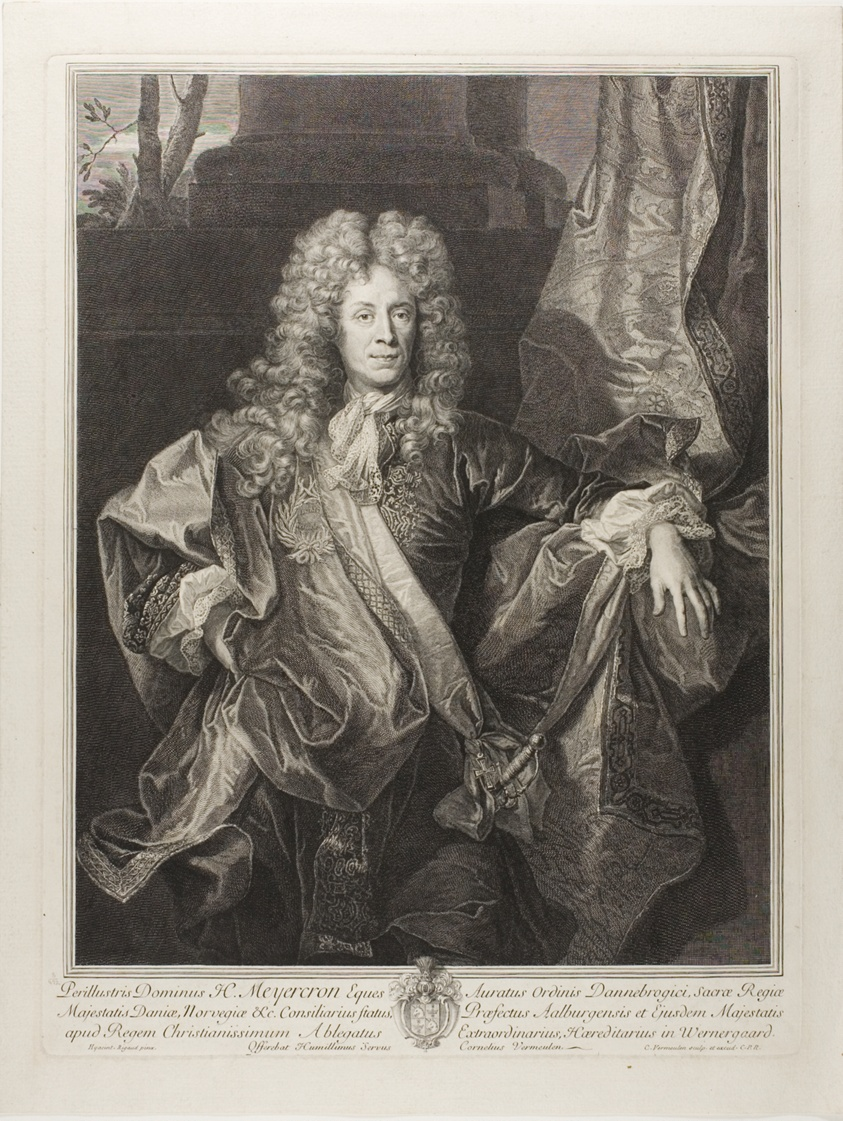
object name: Print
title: Portrait of Henning Meyercron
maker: Cornelis Martinus Vermeulen (Flemish, 1644-1702); after Hyacinthe Rigaud (French, 1659-1743)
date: 1693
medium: Engraving in black on ivory wove paper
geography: Flanders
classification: engraving; print; prints and drawing